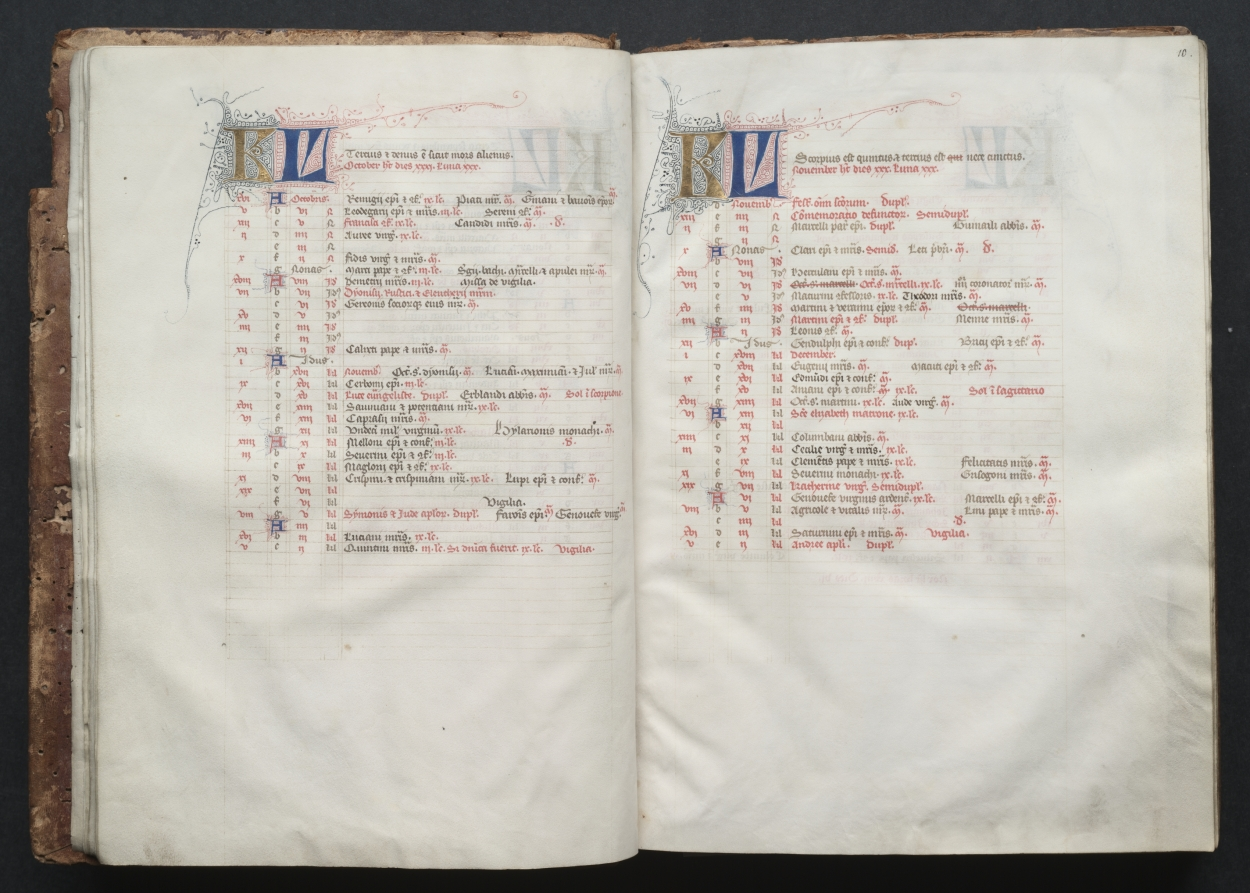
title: The Gotha Missal: Fol. 9v, Text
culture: France, Paris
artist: Master of the Boqueteaux (French)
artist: and Workshop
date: c. 1375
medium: ink, tempera, and gold on vellum; blind-tooled leather binding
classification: Bound Volume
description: The style and quality of this manuscript's decoration is typical of deluxe Parisian books made for aristocratic or royal patrons. Most of the book's decoration appears to be the work of the Master of the Boqueteaux, an artist active at the court of King Charles V (died 1380). His style was apparently shared by a number of book illuminators working in and around Paris. It is very possible that the Gotha Missal belonged to Charles V, but is not provable because the manuscript has no royal portraits and lacks a colophon. Given the book's magnificent decoration, however, it would seem that it was produced for a Valois prince, if not for the king himself. The manuscript receives its name from the German dukes of Gotha, its later owners.